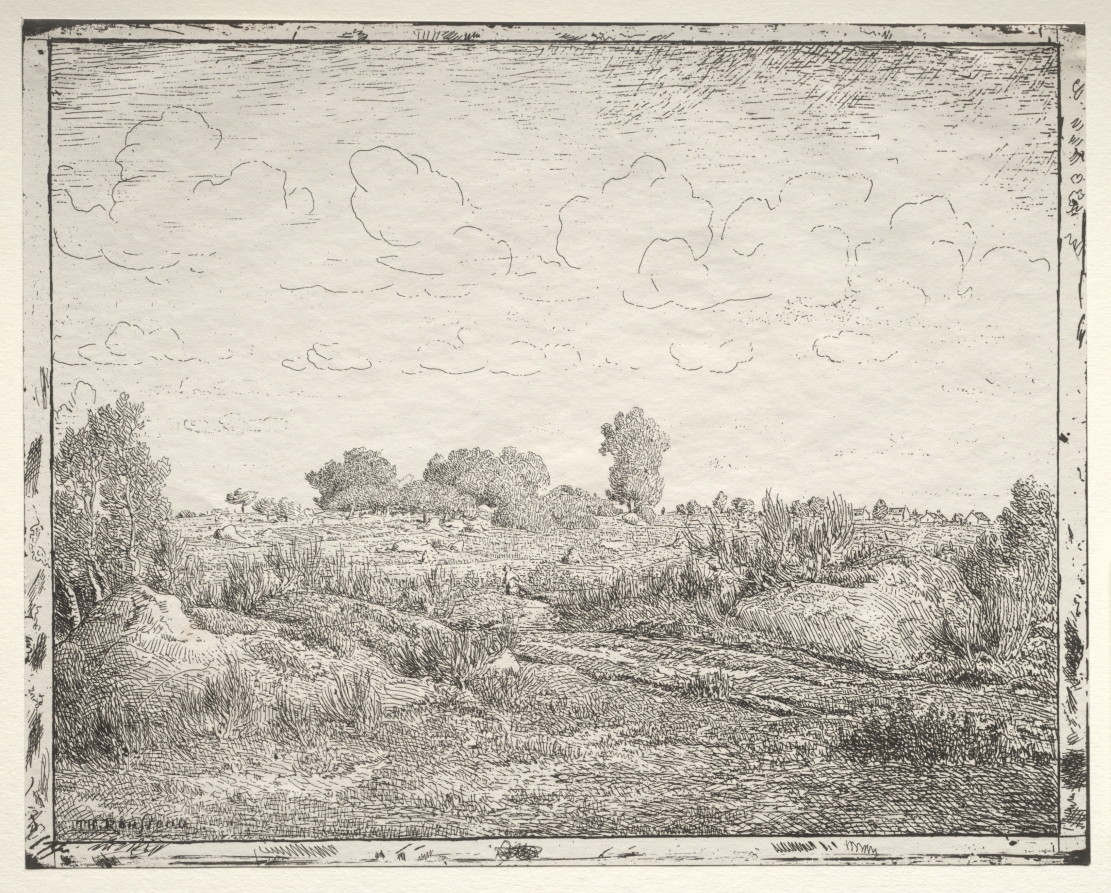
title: La Plaine de la Plante à Biau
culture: France, 19th century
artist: Théodore Rousseau (French, 1812–1867)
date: c. 1854–62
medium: cliché-verre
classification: Print